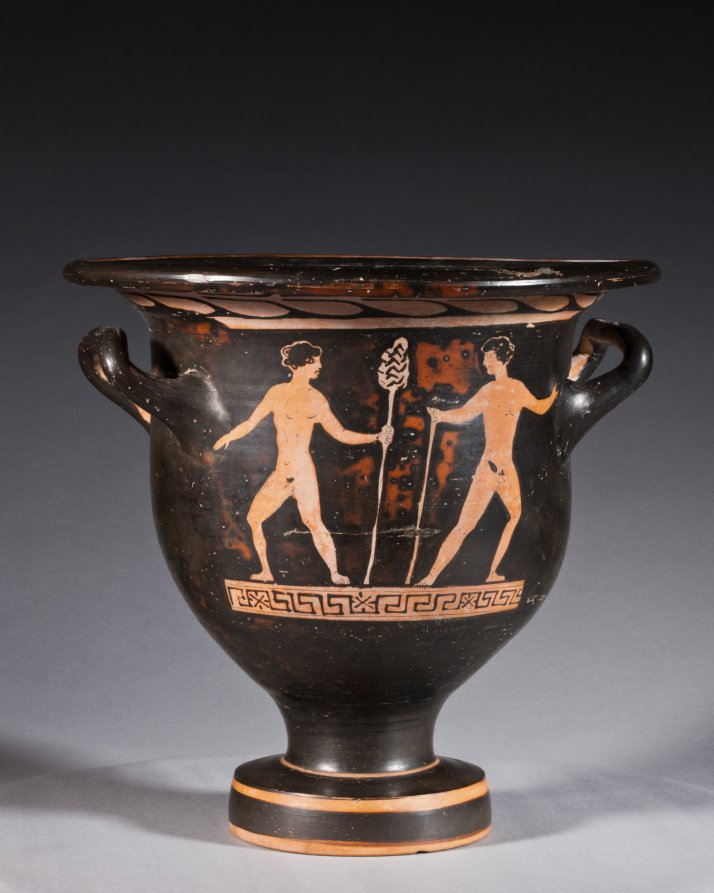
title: Red-Figure Bell Krater (Mixing Vessel): Aphrodite and Eros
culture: South Italian, Apulian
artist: attributed to Graz Painter (South Italian, Apulian, active c. 380–360 BCE)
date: c. 370–360 BCE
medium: ceramic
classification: Ceramic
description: This small mixing vessel shows a finely dressed woman seated on a chest and holding up a mirror to admire herself. Before her stands Eros, the winged god of love, holding a ribbon or sash. Behind the woman stands a pillar with the inscription ΑΦΡΟΔΙΤΗ, or APHRODITE, the goddess of love. Such labels are rare on vases, and scholars debate whether this names the woman shown as Aphrodite herself, with her son Eros, or a bride envisioning herself as Aphrodite, just before her wedding.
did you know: The dancing nude youths on the reverse are unusual; typically they would be standing and draped.